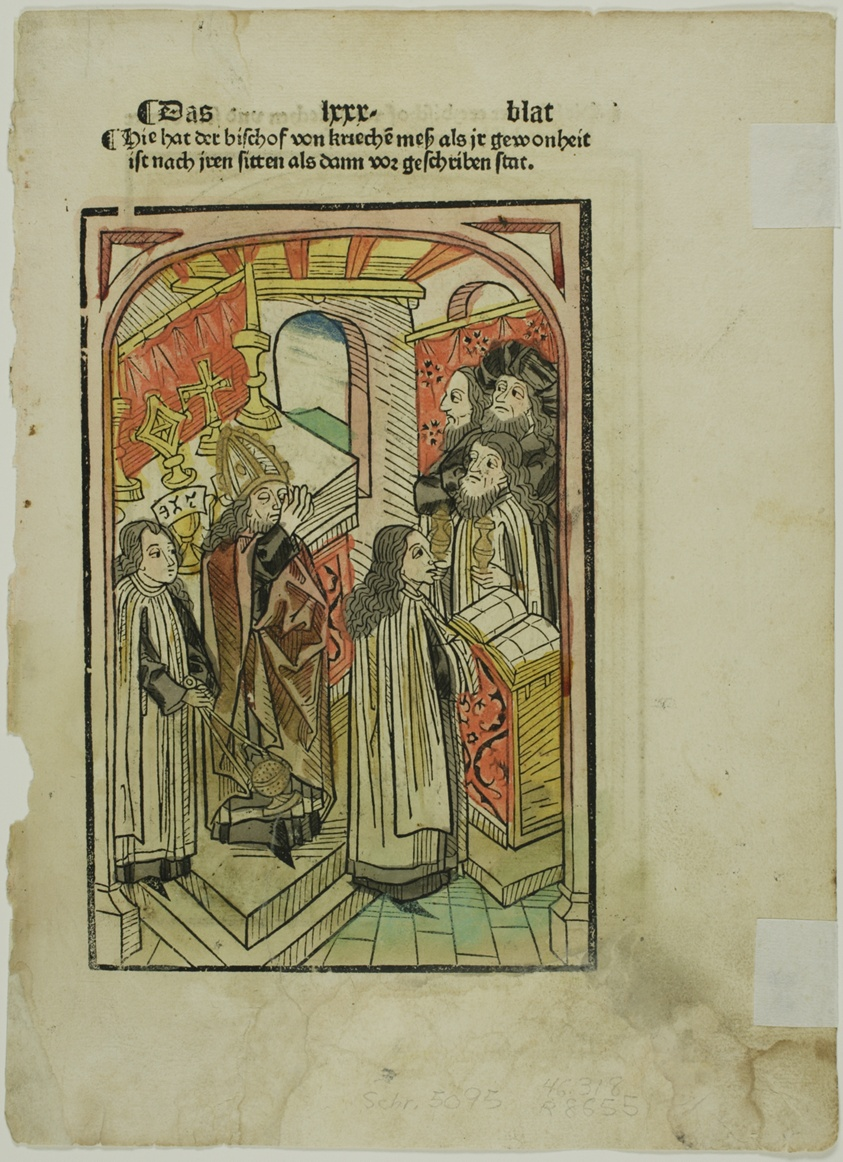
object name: Print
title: Pope Martin Conducting Mass from Conciliumbuch (recto); Greek Bishop and His Servant Hearing Mass (verso)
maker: Ulrich von Reichenthal (German, c. 1365-1437); or an unknown Artist (Augsburg, 15th century); printed by Anton Sorg, Augsburg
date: 1483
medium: Handcolored woodcut (recto and verso) on white laid paper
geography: Germany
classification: woodcut; print; prints and drawing; paper